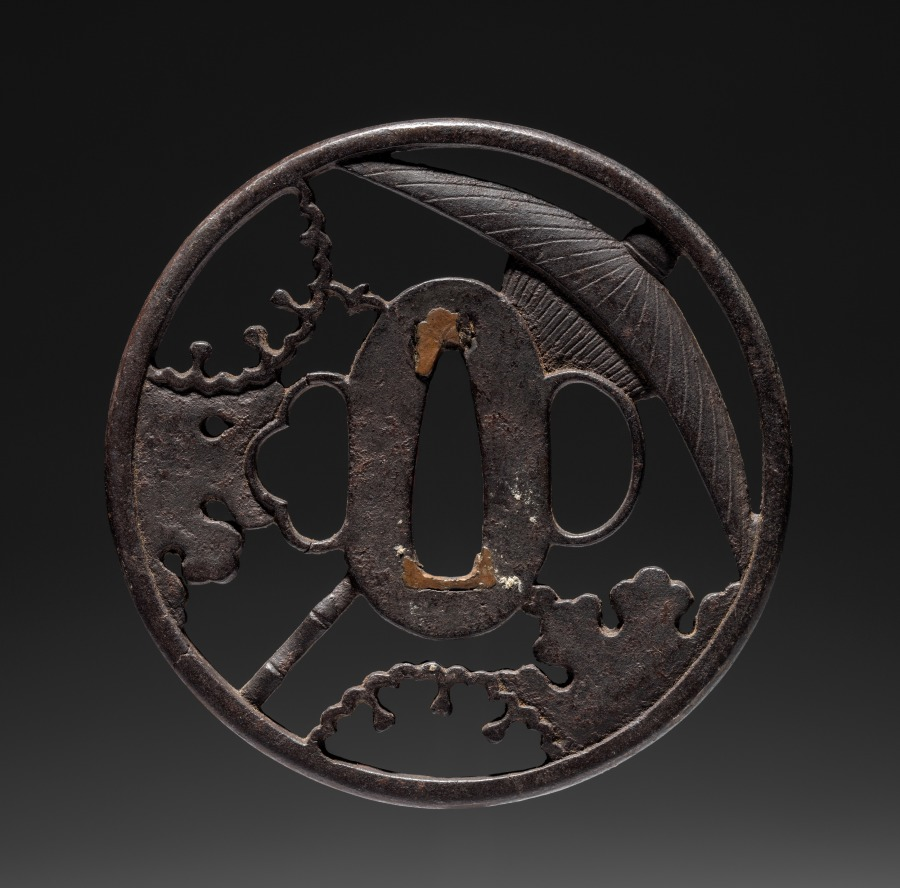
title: Sword Guard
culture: Japan, Edo period (1615–1868)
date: 1615–1868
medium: iron (Akasaka type)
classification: Arms and Armor